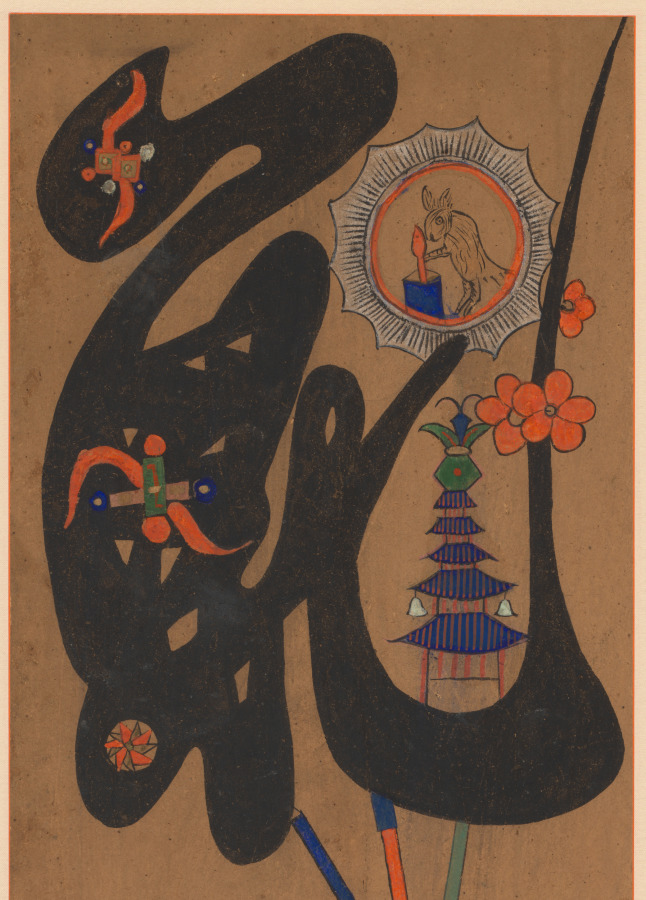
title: Munja-Chaekgeori Screen (Character-Books Screen)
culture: Korea, Joseon dynasty (1392–1910)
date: early 1900s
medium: Eight-panel folding screen, ink on paper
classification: Painting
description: This folding screen is a whimsical harmony of two different subjects: chaekgeori, or books and things; and munja, or characters. The lower section of each panel depicts the imagery of things, including books, decorative arts, and utilitarian objects. The upper portion of each panel bears a classical Chinese character. Read from far right to left, the eight characters refer to the values of Confucian teachings of the Joseon dynasty: filial piety, brotherly love, loyalty, trust, propriety, righteousness, modesty, and humility. While these two pictorial genres are harmoniously conjoined on the same picture plane, two sharply contrasting world views—urban consumerism and traditional Confucian ethics that despise materialism—compete with one another.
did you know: The eight Korean characters each mean filial piety, brotherly love, loyalty, trust, propriety, righteousness or justice, modesty or integrity, and humility or the feeling of shame.